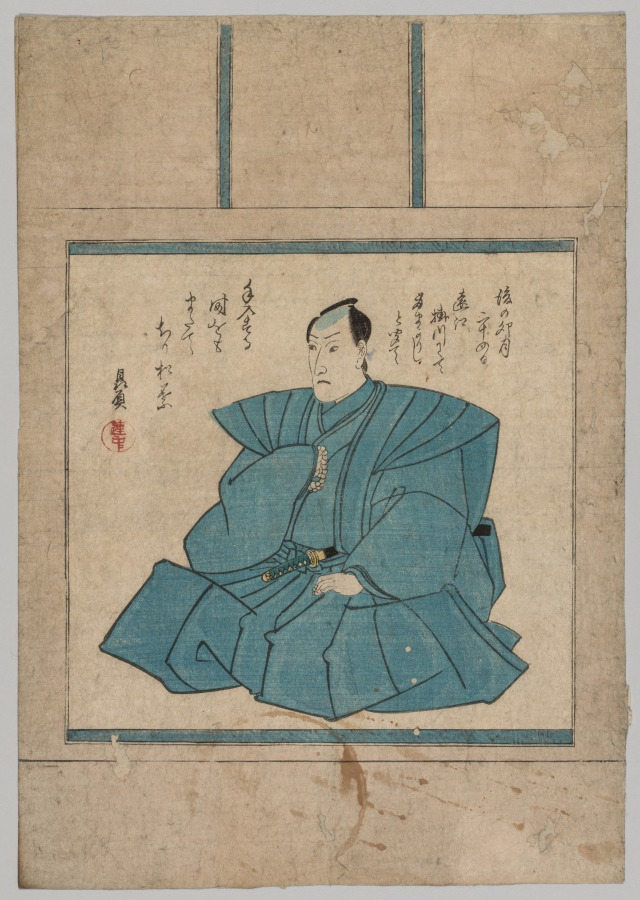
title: Portrait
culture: Japan, Edo period (1615–1868)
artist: Utagawa Kunisada (Japanese, 1786–1865)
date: 1786–1865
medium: color woodblock print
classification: Print